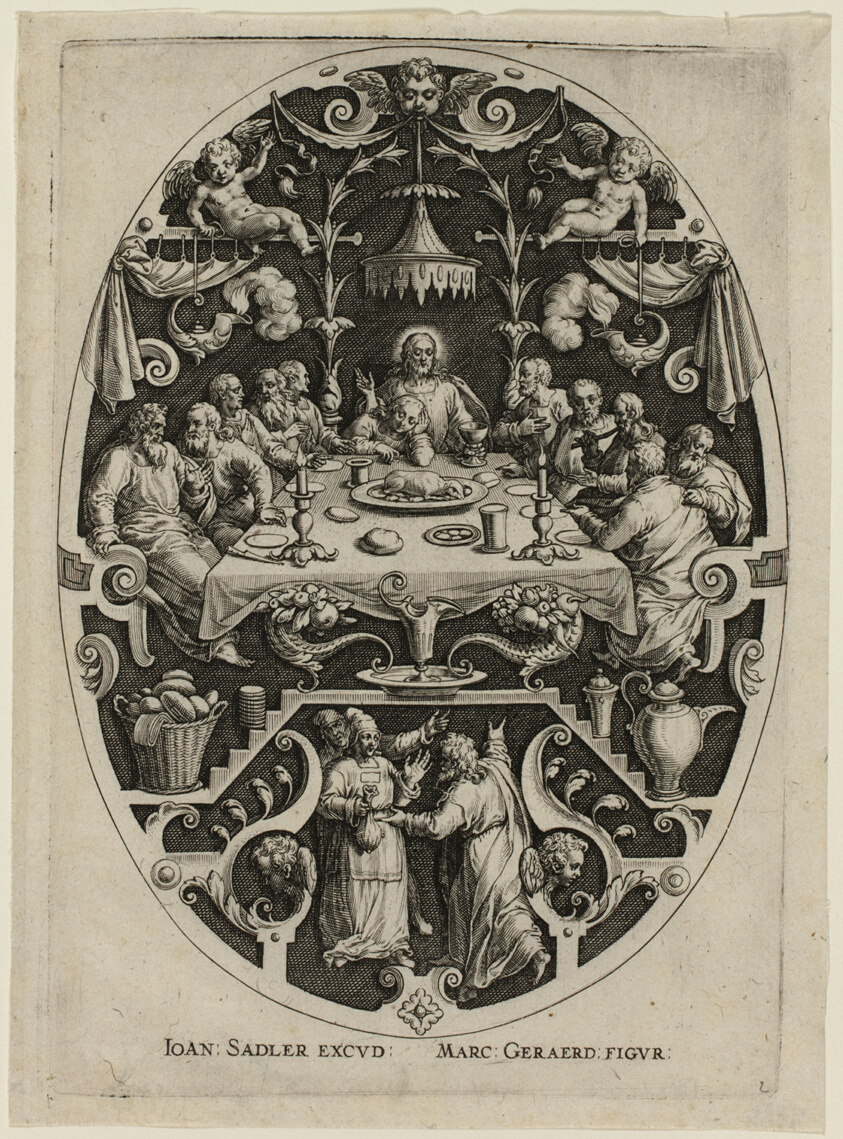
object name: Print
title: Last Supper, from Passion of Christ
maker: Jan Sadeler, the Elder (Flemish, 1550-1600); after Marcus Gheeraerts, the Elder (Flemish, c. 1520-c. 1590)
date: 1575/1600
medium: Engraving in black on ivory laid paper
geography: Flanders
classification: engraving; print; prints and drawing